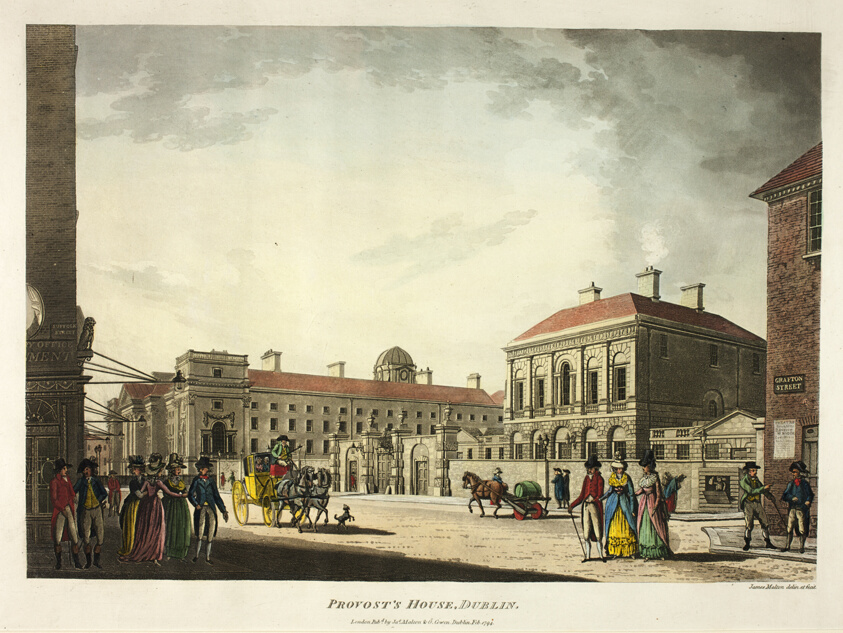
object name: Print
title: Provost's House, Dublin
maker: James Malton (English, 1761-1803)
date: published February 1794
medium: Hand-colored aquatint in black on ivory wove paper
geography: England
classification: aquatint; print; prints and drawing